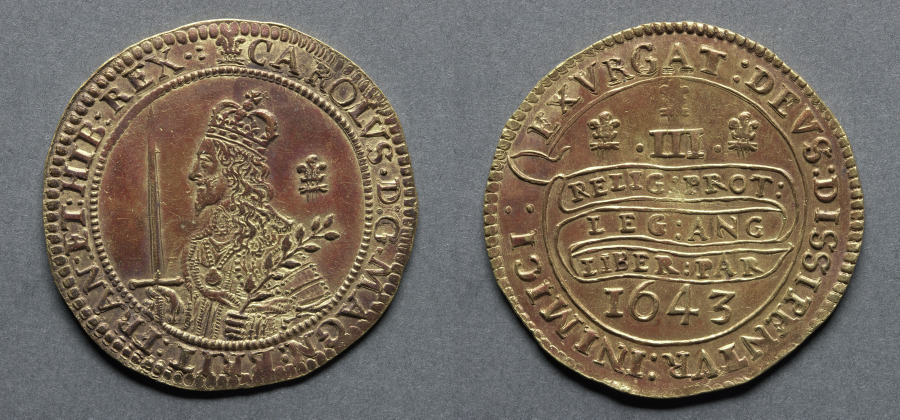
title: Triple Unite or Three Pound Piece: Charles I (obverse); Declaration on Scroll (reverse)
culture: England, Charles I, 1625-1649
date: 1643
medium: gold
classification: Coins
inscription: CAROLUS DG MAG BRIT FRAN ET HIB REX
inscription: III RELIG PROT LEG ANG LIBER PAR 1643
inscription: EXURGAT DEUS DISSIPENTUR INIMICI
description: When the Civil War or Great Rebellion started in 1642, Charles I, having raised his standard at Nottingham on August 22, 1642, fought his way south through the battles of Edgehill and Brentford, but failing to enter London he finally set up his headquarters at Christ Church College, Oxford. At Wellington, Shropshire, on September 19, the king had declared to the that he would protect "the religion of the Protestants, the laws of England, (and) the liberty of Parliament." This declaration, abbreviated and rendered in Latin, appeared on various denominations of the royal coinage as propaganda. In full it reads RELIGIO PROTESTANIUM LEGES ANGLIÆ LIBERTAS PARLIAMENTI. The plume initial mark does not now serve as a date indication as it did before the war started. This, the largest and heaviest type of gold coin ever to be struck in England, is very rare. It was doubtless made from local plate, so much of which, in gold and silver, the king "borrowed" from the colleges of Oxford and from his supporters, promising to repay when better times returned.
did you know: The Triple Unite, valued at three pounds, was only produced during the English Civil War between 1642 and 1644.